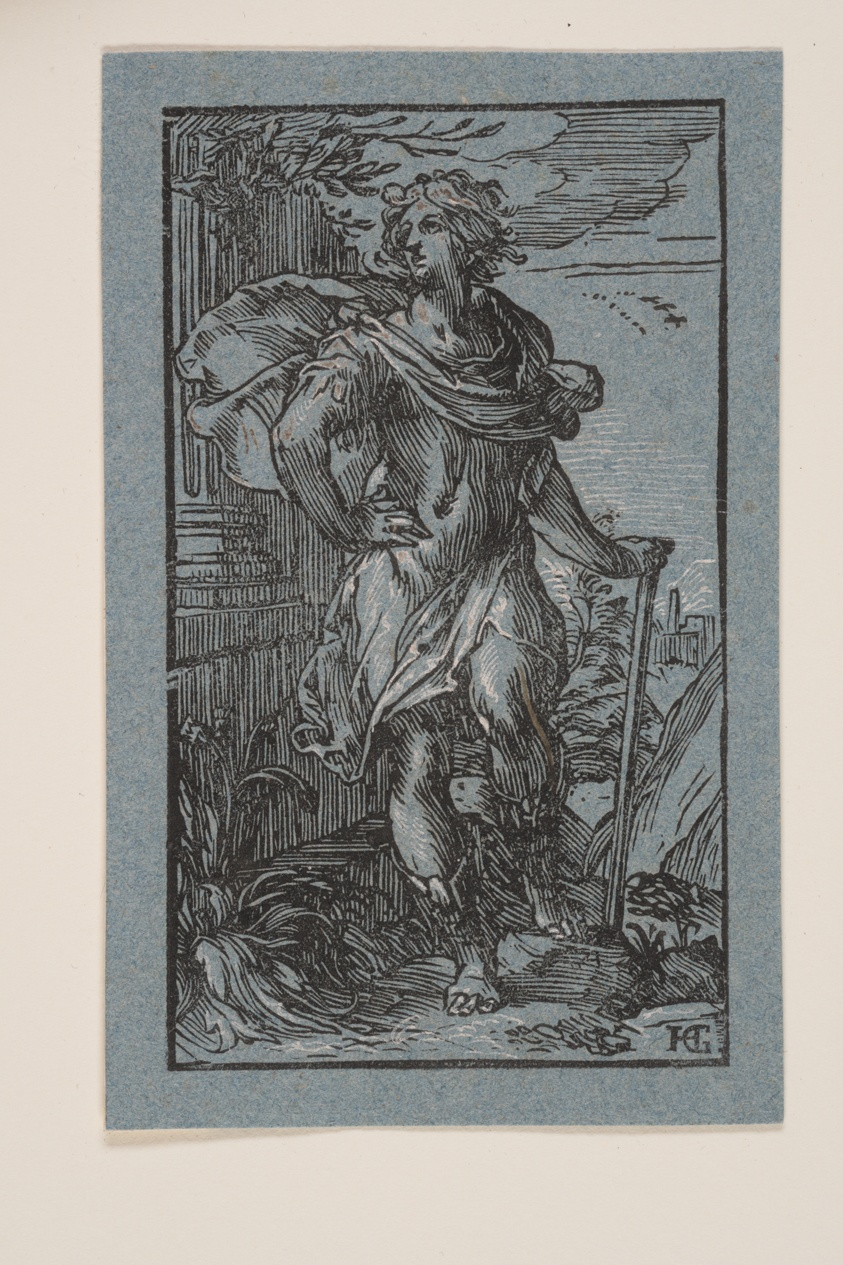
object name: Print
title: Standing Young Man with a Cane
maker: Hendrick Goltzius (Dutch, 1558–1617)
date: c. 1596-1600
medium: Woodcut in black printed on blue paper with white heightening (partially discolored)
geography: Netherlands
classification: woodcut; paper; print; prints and drawing